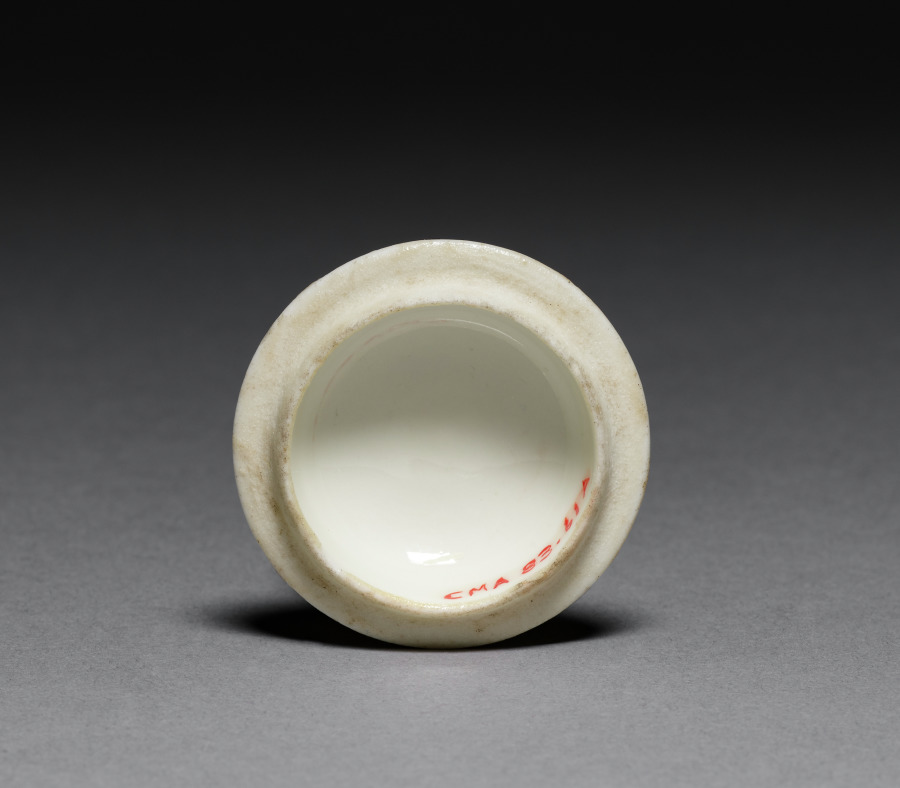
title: Cover for a Pomade Pot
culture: France, 18th century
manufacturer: Saint Cloud Porcelain Factory (French)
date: c. 1730–40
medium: soft-paste porcelain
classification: Ceramic